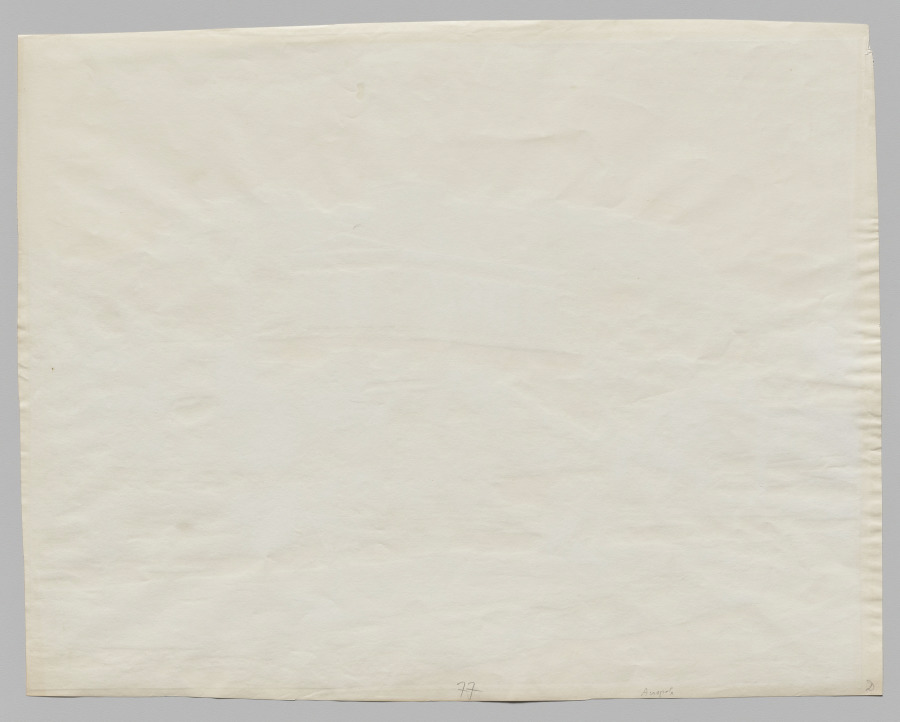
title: View of the Acropolis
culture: France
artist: Adolphe Braun & Co. (French, 1845–1894)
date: c. 1880s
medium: mammoth carbon print, brown-toned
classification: Photograph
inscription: Pencil marking on recto left margin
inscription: Numbers imprinted on recto, right margin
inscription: Written in pencil on verso: "77"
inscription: Written in pencil on verso: "Acropole"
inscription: Written in pencil on verso: "D"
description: Adolphe marketed his photos of flowers, artworks, landscapes, and monuments from across Europe throughout that continent and in North America. The Acropolis of Athens, the most famous ancient Greek site, must have sold well; Braun offered multiple views of it. The image on a carbon print is formed from pigmented gelatin, which is far more resistant to fading than the silver or metal salts in silver-based prints.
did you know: Carbon prints are among the stable and long-lasting photographic processes.